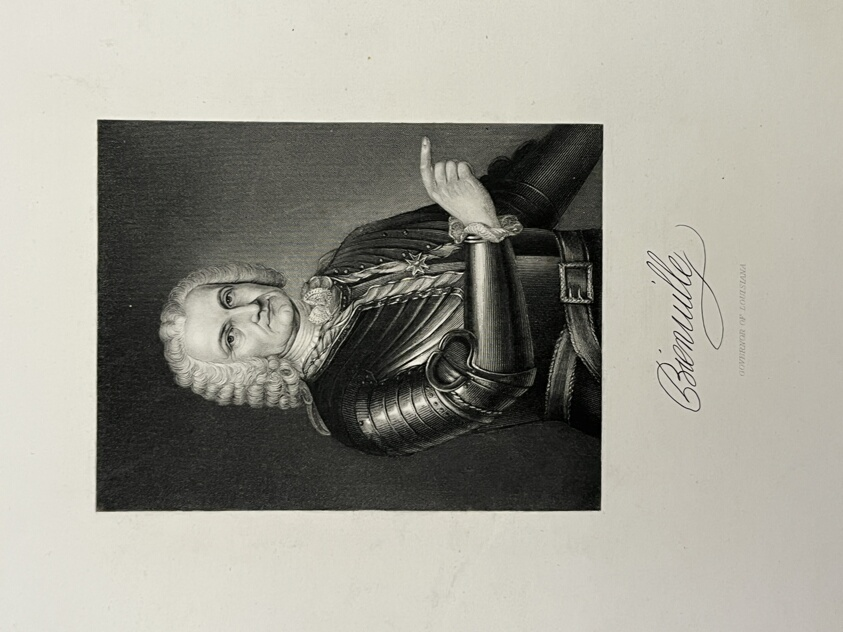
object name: Print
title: Bienville, Governor of Louisiana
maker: John Chester Buttre (American, 1821-1893); after Artist Unknown (American, 19th century)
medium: Etching on paper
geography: United States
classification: reproduction; print; prints and drawing